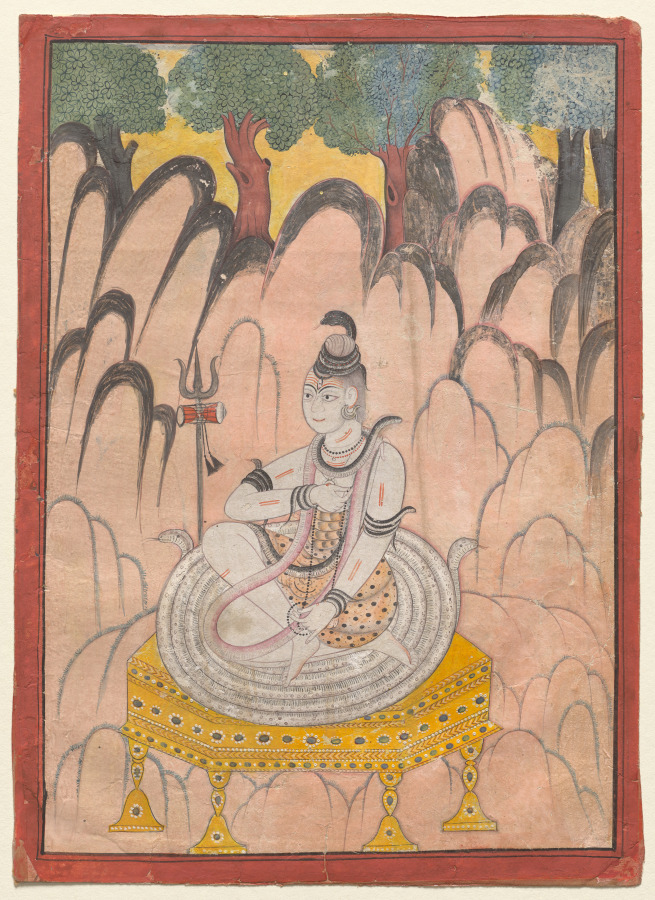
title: Shiva Seated on a Throne in a Landscape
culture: Northern India, Pahari kingdoms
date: c. 1755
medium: gum tempera on paper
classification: Painting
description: Shiva is depicted sitting on snakes coiled up together on a royal seat. The scene is set in a rocky mountainous setting with a row of trees in the background. In the paintings from Chamba, Shiva is usually depicted with a white complexion in three-quarter view. This formula has remained consistent for over a century with very few exceptions.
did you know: Shiva is clad in tiger hide wrapped around his waist.